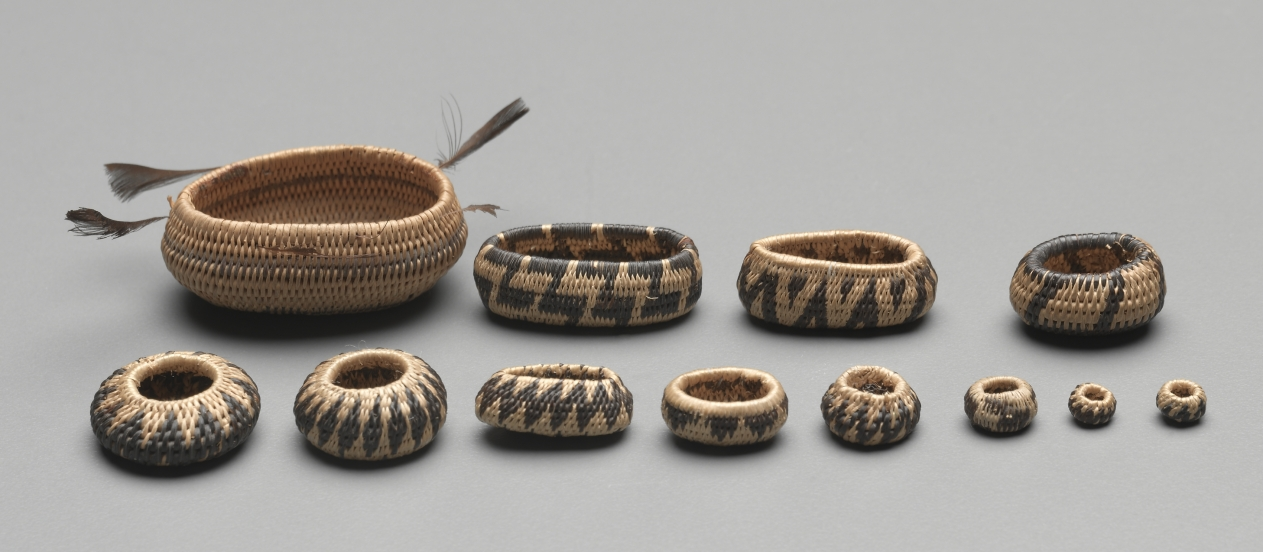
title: Miniature Rhomboidal Basket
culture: California, Pomo, late 19th-early 20th century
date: late 1800s-early 1900s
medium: plant materials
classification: Basketry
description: Miniature baskets were made to demonstrate the basket-maker’s virtuoso skill, and these tiny marvels seem to be no exception—the smallest are just a few millimeters wide but still patterned. For such fine work, dexterity was required as much for preparation of materials as for weaving.